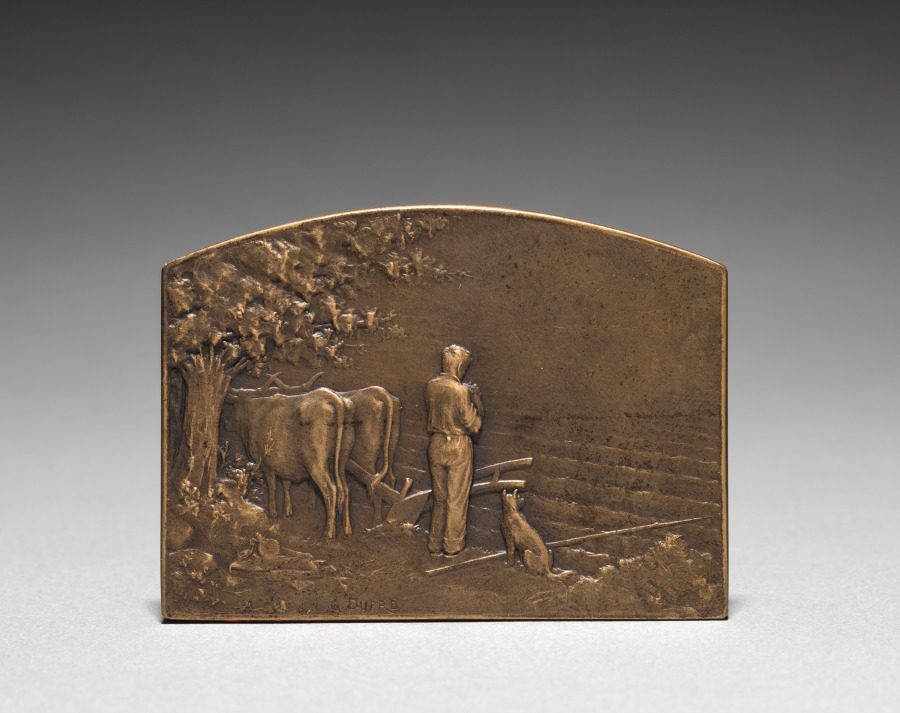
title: Medallion (obverse)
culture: France, 19th-20th century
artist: Jules Dupré (French, 1811–1889)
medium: bronze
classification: Metalwork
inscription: signed: "G. Dupré."